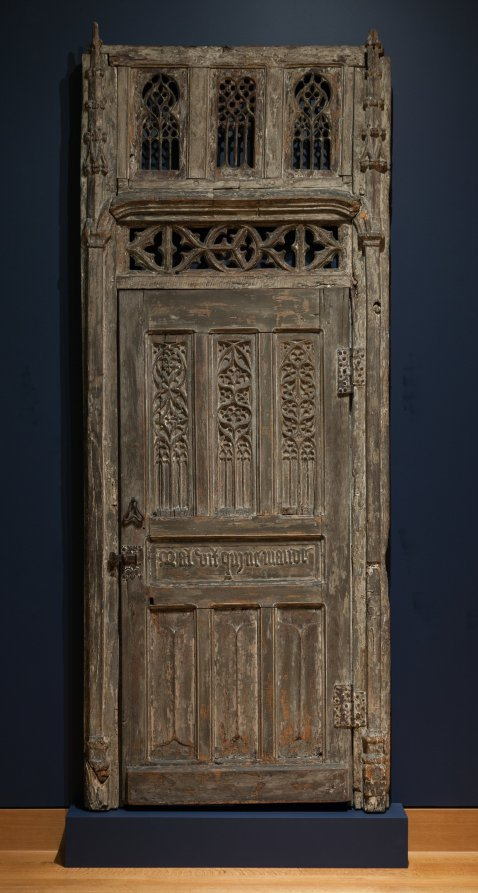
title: Door and Frame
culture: France, late 15th century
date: late 1400s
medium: oak with traces of polychromy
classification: Furniture and woodwork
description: This elaborately carved door and frame was intended for use in a protected interior space as suggested by the delicate open tracery above and its use of polychromy. Though its original context is unknown, the door's placement may have been within either a domestic or ecclesiastical building. The inscription in Old French—Mal vit qui ne mande—is enigmatic and has been suggested to translate roughly as "He lives badly who does not ask." The source of the inscription is unclear but may have been a proverb or motto current during the time.